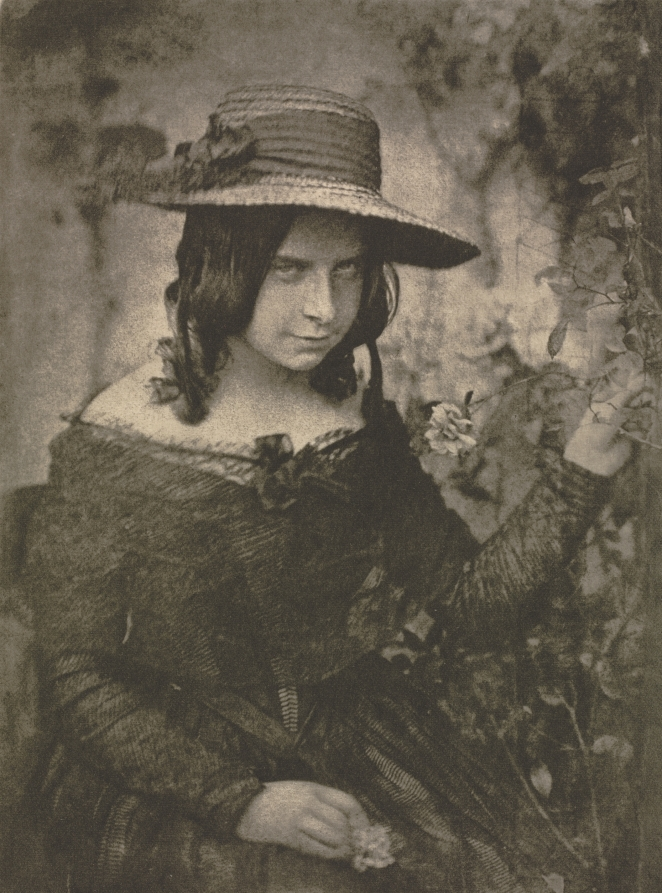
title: Camera Work: Girl in Straw Hat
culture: England, 20th century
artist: David Octavius Hill (British, 1802–1870)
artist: and Robert Adamson (British, 1821–1848)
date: 1912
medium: photogravure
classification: Bound Volume